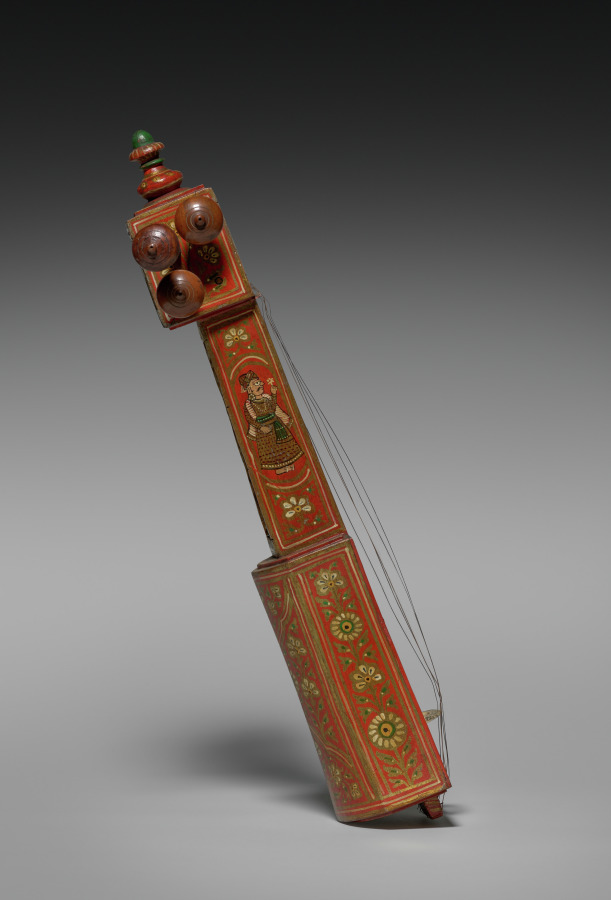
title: Sarangi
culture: India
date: 1800s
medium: Gum tempera and gold on wood with mother-of-pearl and bone or ivory inlays; metal strings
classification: Musical Instrument